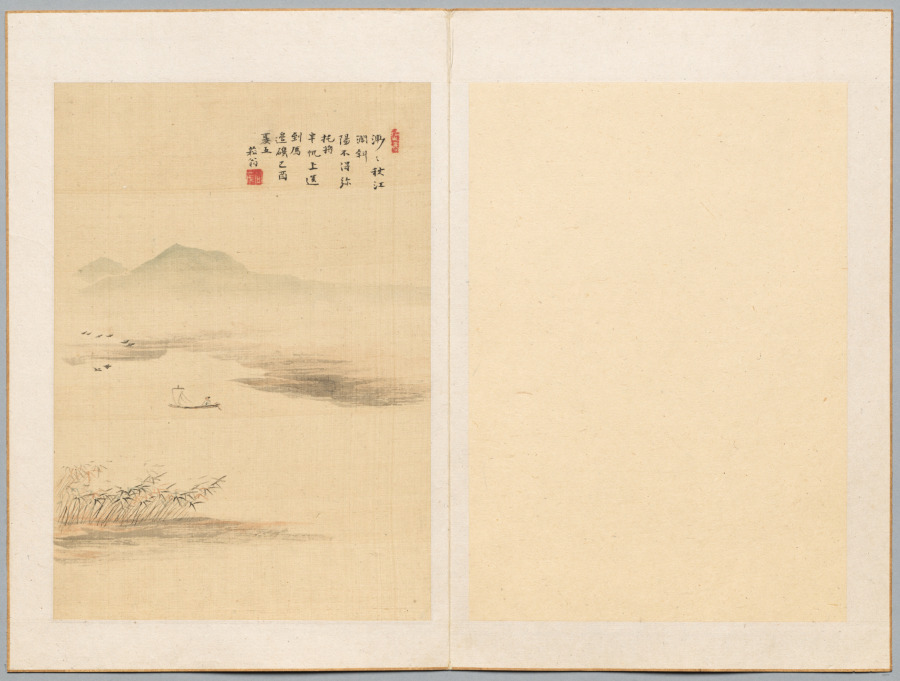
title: Autumn River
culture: Japan, Edo period (1615–1868)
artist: Nukina Kaioku (Japanese, 1778–1863)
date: 1849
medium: leaf from a pair of albums; ink and light color on paper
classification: Portfolio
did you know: Nukina Kaioku was one of the three great calligraphers of the final years of the Edo period (1615–1868), known as the "Three Brushes of the End of the Military Government (Bakumatsu Sanpitsu)."